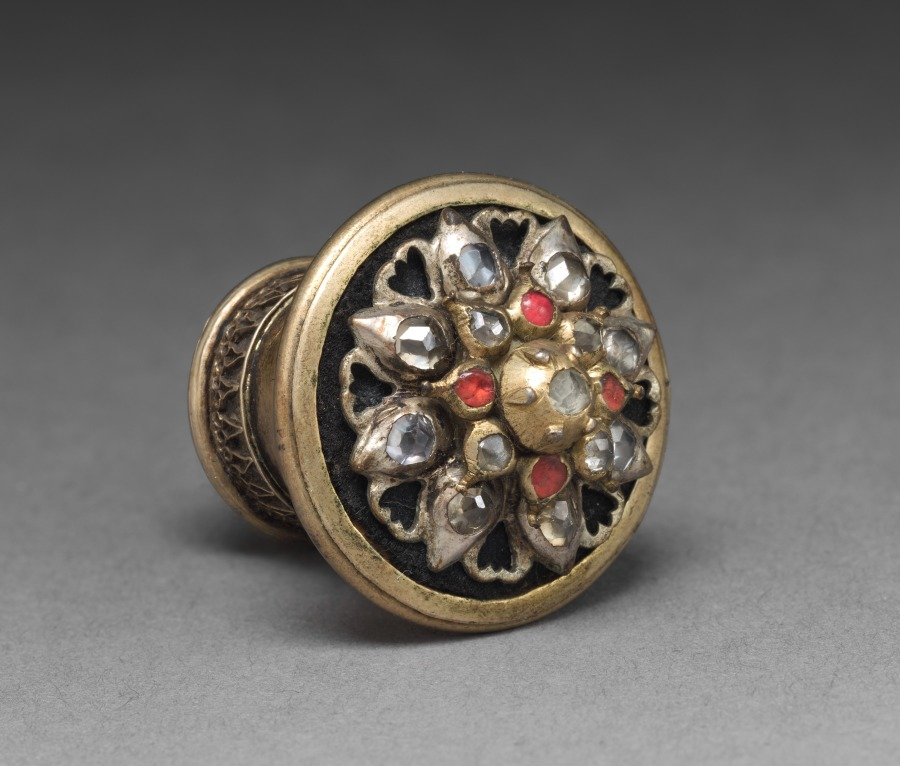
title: Ear Stud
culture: Burma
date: 1800s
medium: gold and rubies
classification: Jewelry